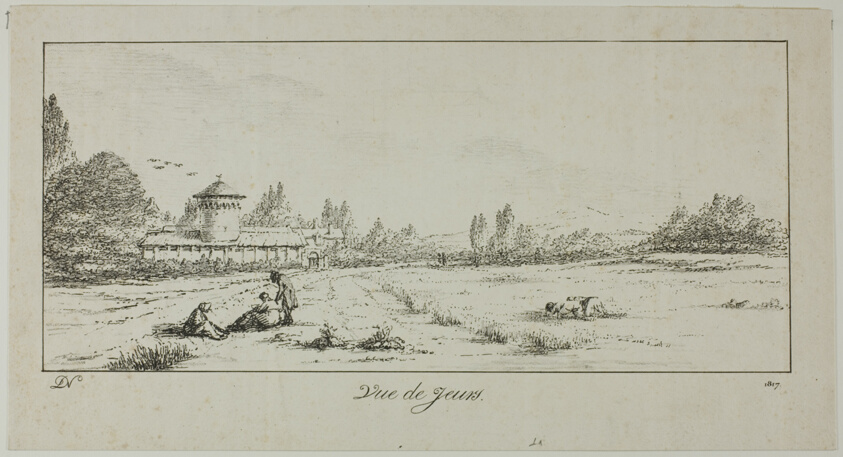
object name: Print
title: View of Jeurs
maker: Dominique-Vivant Denon (French, 1747-1825)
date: 1817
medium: Lithograph in black (both crayon and pen and ink style) on ivory wove paper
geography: France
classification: lithograph; print; prints and drawing